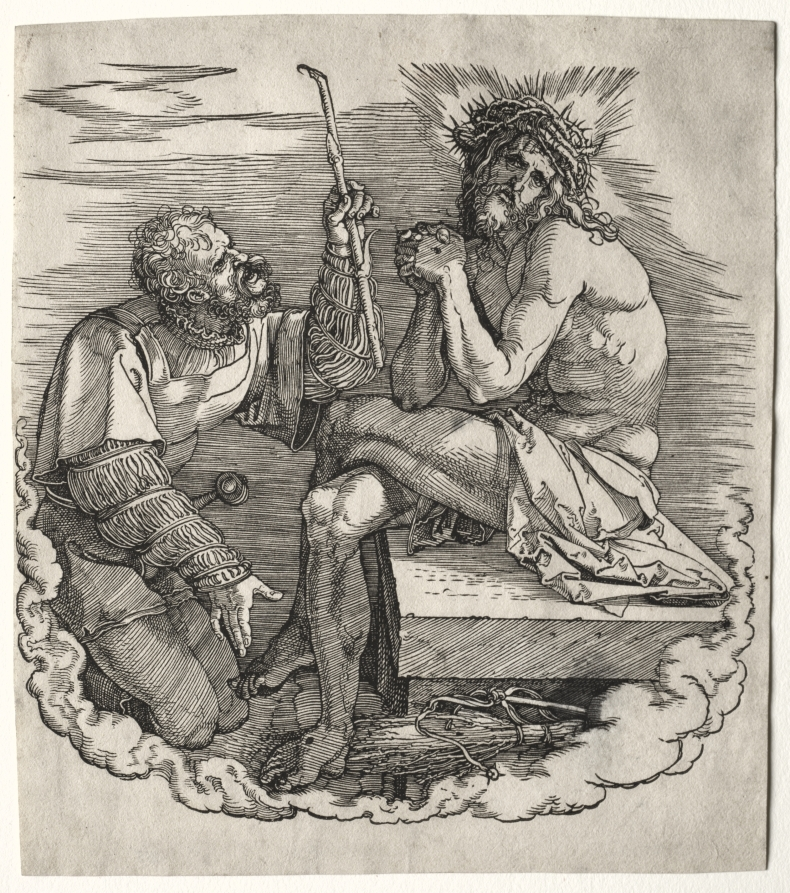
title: The Great Passion: Title Page - Christ, Man of Sorrows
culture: Germany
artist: Albrecht Dürer (German, 1471–1528)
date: c. 1497–1510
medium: woodcut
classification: Print